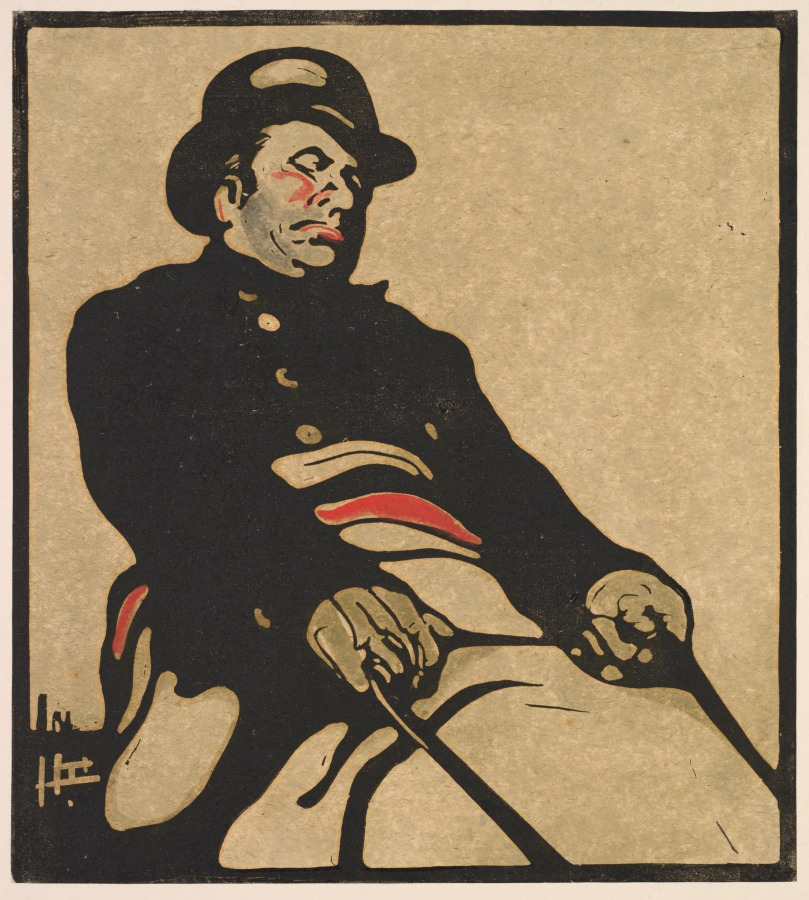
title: London Types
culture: England, 19th century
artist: William Nicholson (British, 1872–1949)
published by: William Heinemann, London and R. H. Russell, New York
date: 1898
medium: original portfolio with cloth cover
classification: Print